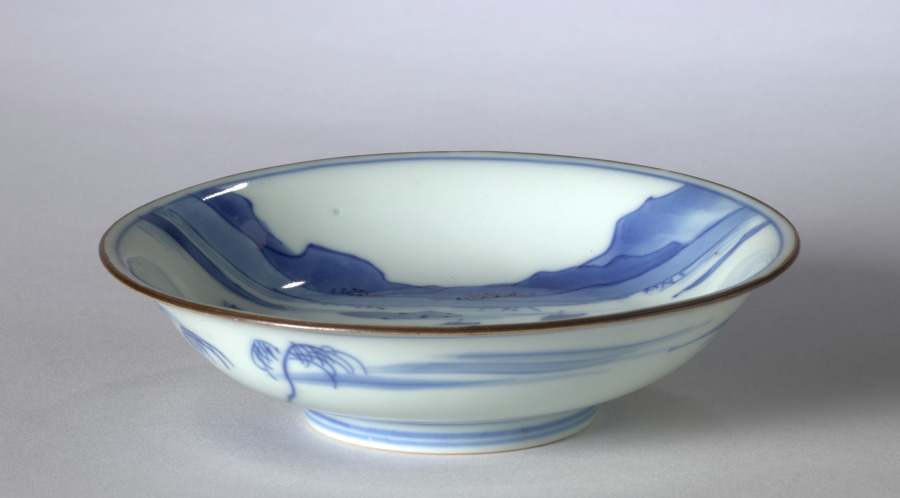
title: Dish with Landscape and Inscription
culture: China, Qing dynasty (1644-1911), Kangxi period (1662-1722)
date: 1662–1722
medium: porcelain, underglaze cobalt-blue decoration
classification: Ceramic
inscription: 何物為君贈，湘江之畫圖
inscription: 大明嘉靖年製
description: The river scene, composed of two shores divided by waterafter the Yuan dynasty master Ni Zan is inscribed: What shall I present the gentleman with? A picture of the Xiang River. A tributary of the Yangzi in Hunan province, the Xiang River is associated with Chinese literature and history, such as the Xiang goddesses, loyal consorts of emperor Shun. They are mentioned in the ancient Songs of the South (Chuci), known for staining the bamboo along the Xiang River with their tears when they thought him lost in the floods. The dish may have been a gift between two departing friends or for a couple.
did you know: There is an apocryphal inscription on the bottom of the dish.